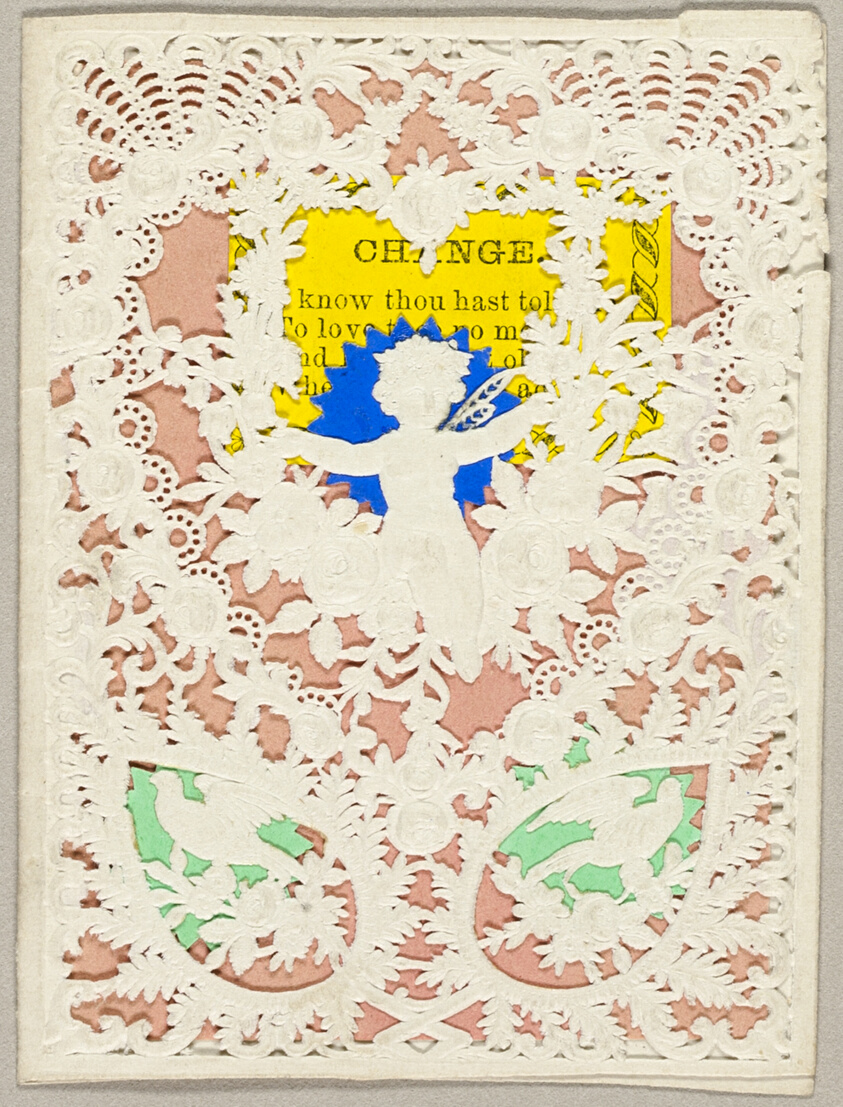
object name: Drawing and Watercolor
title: Change (valentine)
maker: Unknown Artist; American or English, 19th century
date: c. 1850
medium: Collaged elements on cut and embossed (designed) ivory wove paper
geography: United States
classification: collage; valentine; prints and drawing; paper